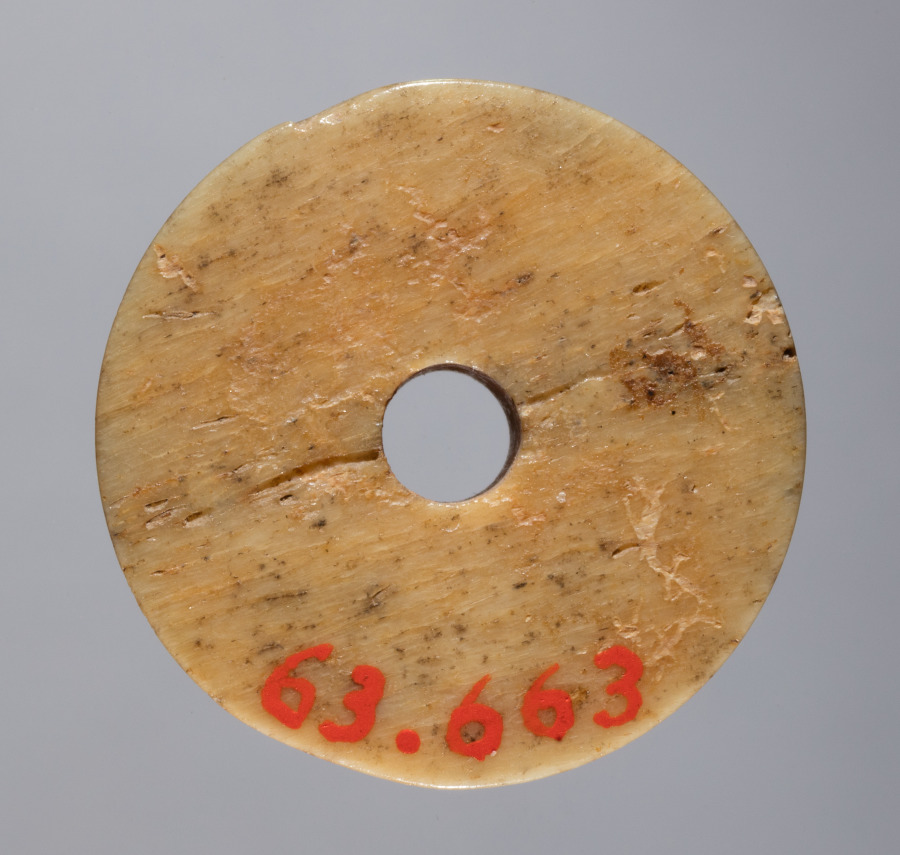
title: Spindle Whorl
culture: Iran, early Islamic period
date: 700s - 900s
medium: bone, incised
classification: Spindle Whorl